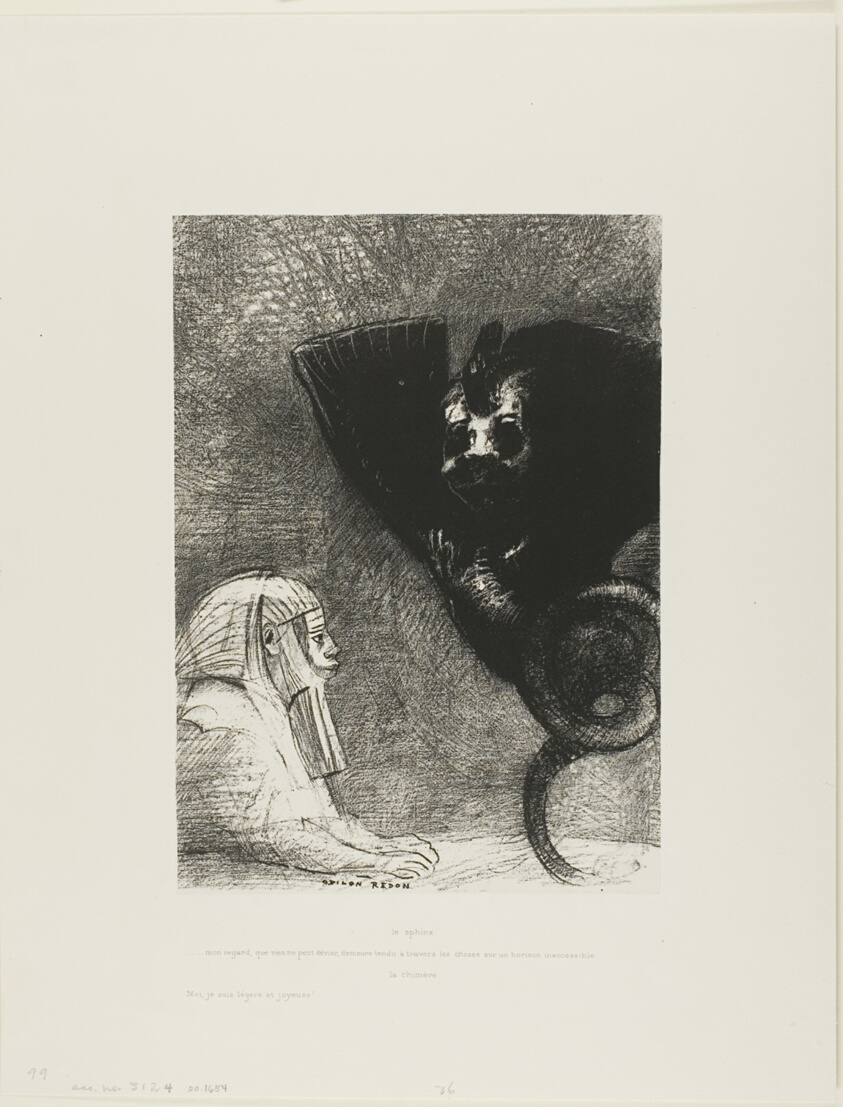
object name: Print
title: The Sphinx: "...my gaze that nothing can deflect, passing through objects, remains fixed on an inaccessible horizon." The Chimera: "As for me, I am light and joyful," plate 5 from To Gustave Flaubert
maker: Odilon Redon (French, 1840-1916)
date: 1889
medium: Lithograph in black on ivory China paper laid down on ivory wove paper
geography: France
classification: lithograph; print; prints and drawing; paper